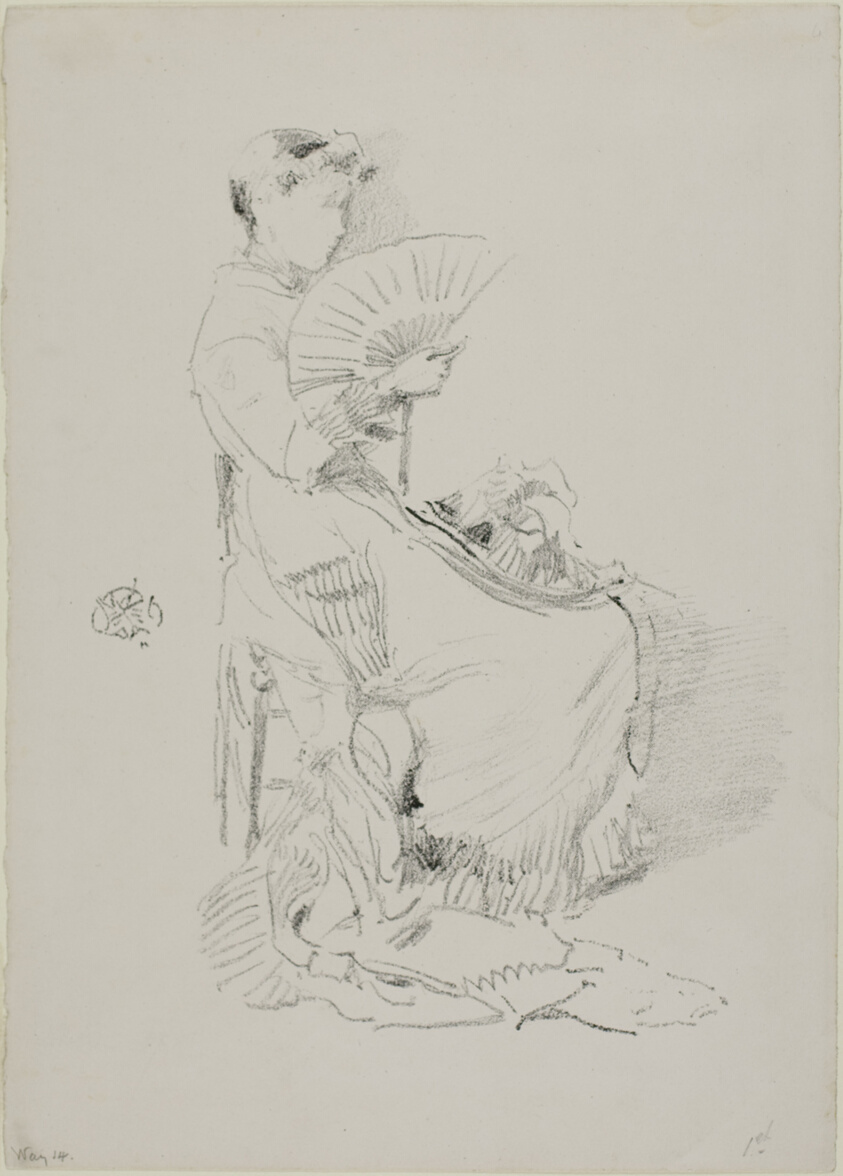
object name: Print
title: The Fan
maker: James McNeill Whistler (American, 1834-1903)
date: 1879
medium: Transfer lithograph in black ink on grayish ivory wove paper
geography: United States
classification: transfer lithograph; lithograph; print; prints and drawing; paper